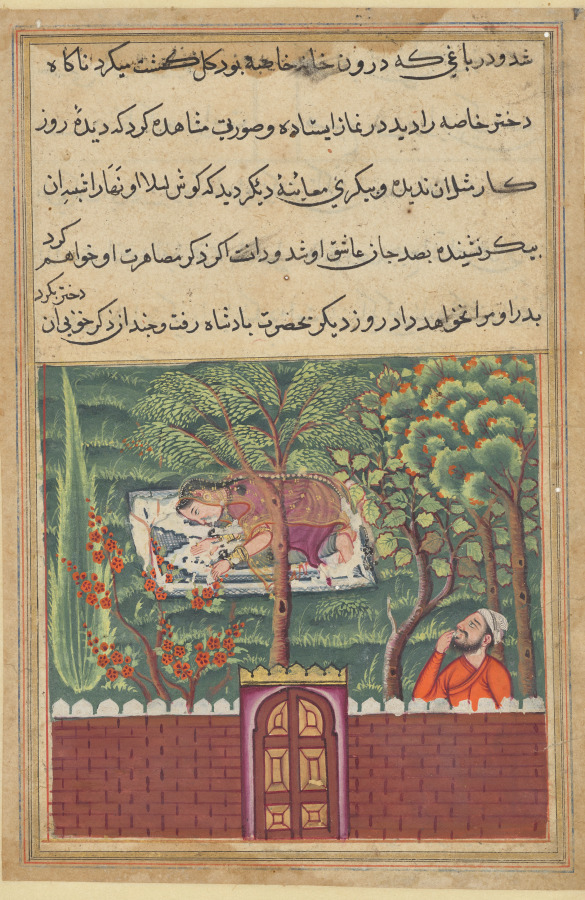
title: Khulasa, a vizier, sees the daughter of Khassa, another vizier, and covets her, from a Tuti-nama (Tales of a Parrot): Fifty-first Night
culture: Mughal India, court of Akbar (reigned 1556–1605)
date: c. 1560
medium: gum tempera, ink, and gold on paper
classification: Painting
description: Khulasa watches Khassa’s daughter as she kneels devoutly on a prayer rug in the garden. He touches his index finger to his mouth, signaling his awe and surprise. Despite his love, Khulasa knows that the woman is chaste and will not agree to marry him.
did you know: The woman’s figure has been painted over some sections of the tree in the foreground.